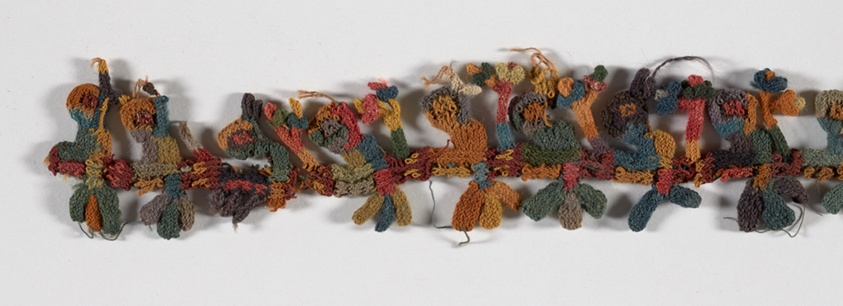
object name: Textile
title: Border Fragment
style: nazca, andean, andes, Pre-Columbian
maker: Nazca; South coast, Peru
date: 100 B.C./A.D. 200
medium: Wool (camelid), tubular cross-knit looping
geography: Peru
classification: textile; weaving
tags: super/natural